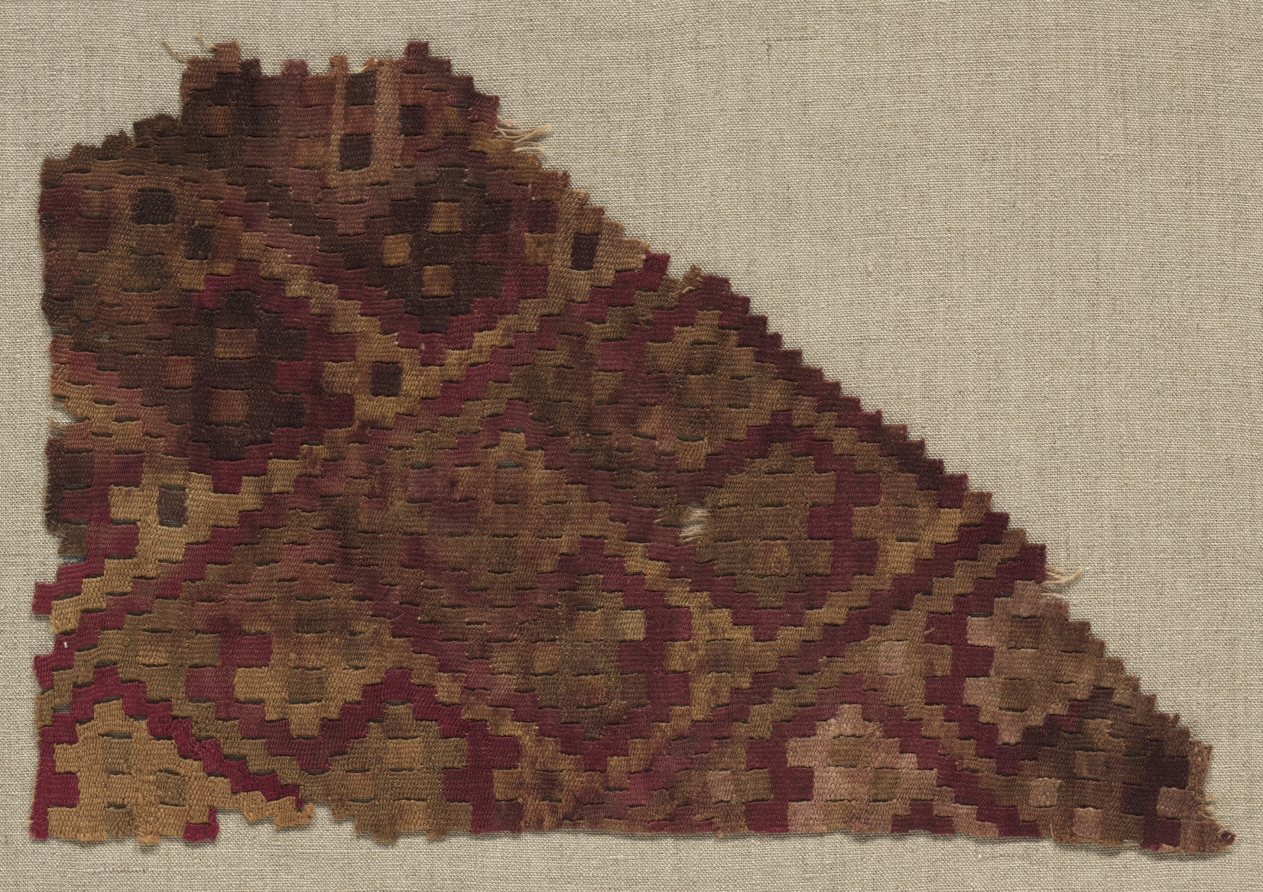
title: Fragment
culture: Peru, Central Coast, Chancay, 12th-15th century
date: c. 1100–1400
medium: tapestry: cotton and wool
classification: Textile